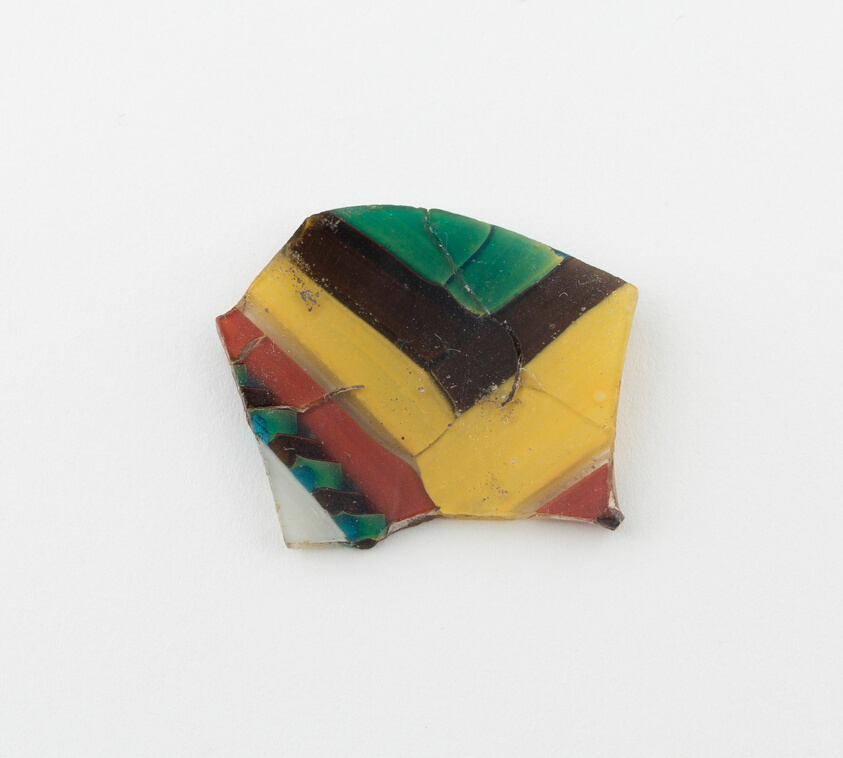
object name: Decorative Arts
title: Fragment of a Bowl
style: roman (ancient, style or period), ancient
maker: Roman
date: 1st century BCE–1st century CE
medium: Glass, ribbon technique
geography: Roman Empire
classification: fragment; decorative arts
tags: decoration